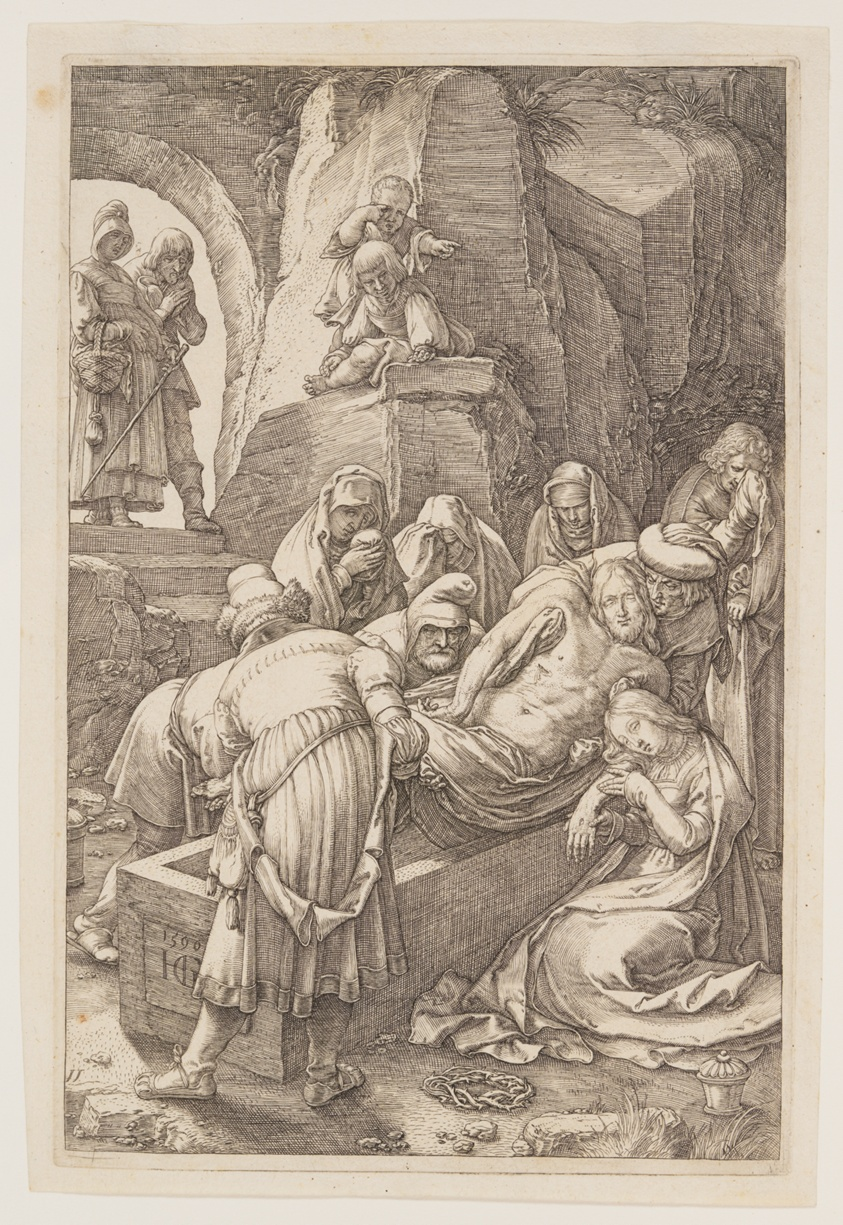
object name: Print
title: The Entombment, from The Passion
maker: Hendrick Goltzius (Dutch, 1558–1617)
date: 1596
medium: Engraving on ivory laid paper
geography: Netherlands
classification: engraving; paper; print; prints and drawing